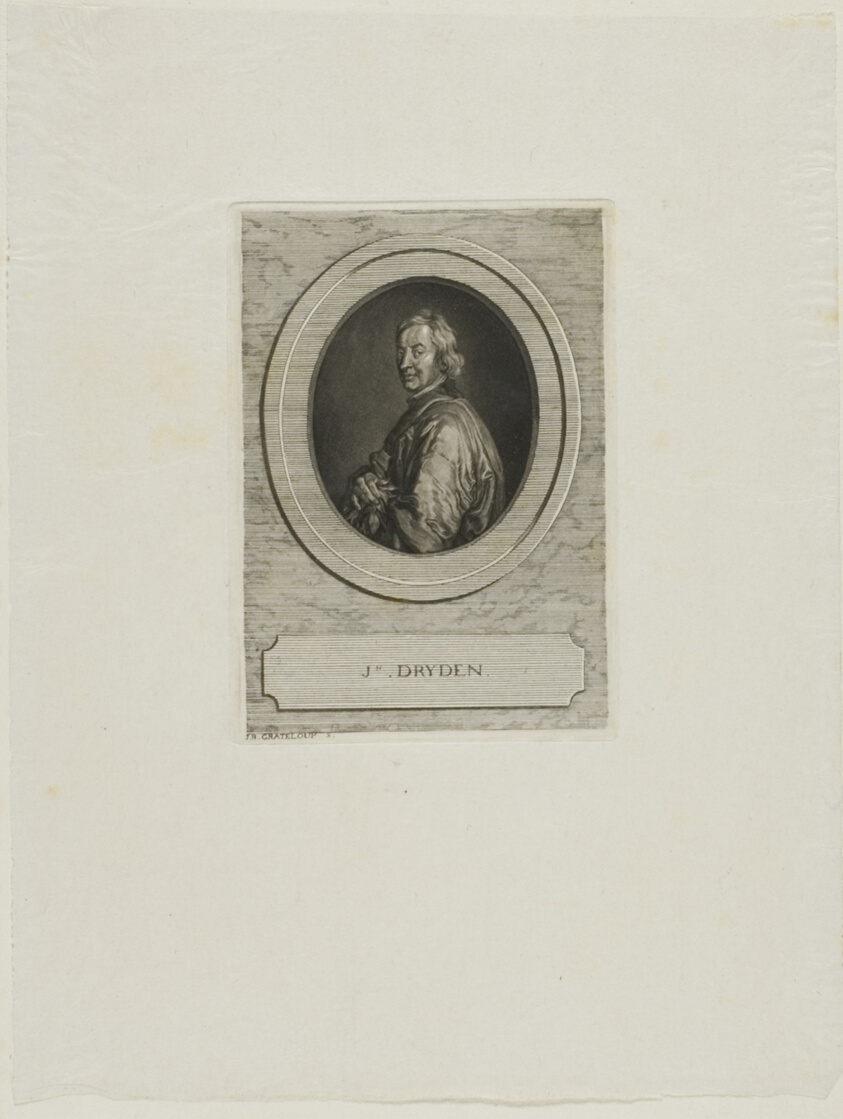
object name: Print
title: John Dryden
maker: Jean-Baptiste de Grateloup (French, 1735-1817)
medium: Aquatint on paper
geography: France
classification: aquatint; print; prints and drawing